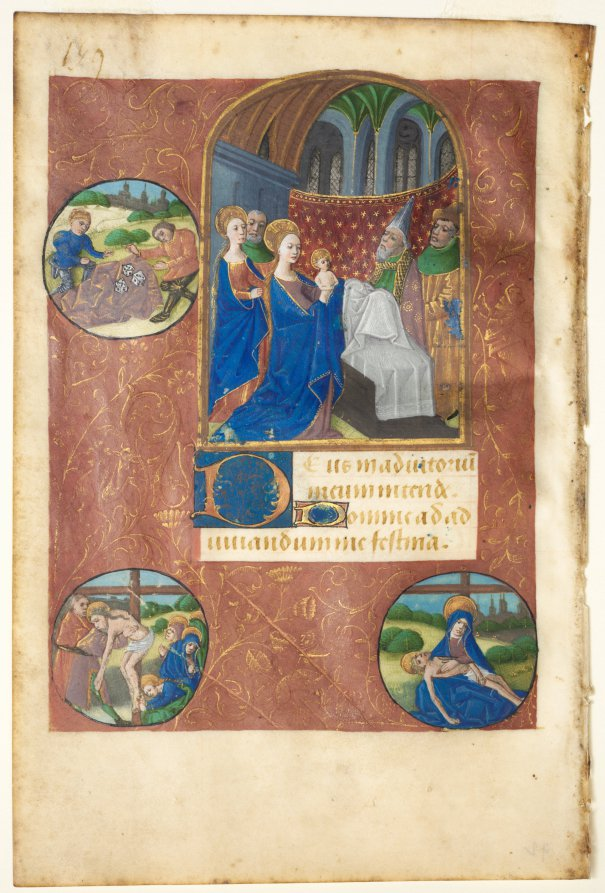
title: Leaf from a Book of Hours: Presentation in the Temple with Roundels of the Casting of Lots, the Deposition, and Pietà (None, Office of the Virgin)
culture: France, probably Poitiers, 15th century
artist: follower of Master of Adélaïde de Savoie (French, active c. 1450–70)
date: c. 1460–70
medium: ink, tempera and gold on vellum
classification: Manuscript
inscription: Deus in adiutorium meum intende. Domine, ad adiuvandum me festina.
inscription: Oratio: Omnipotens sempiterne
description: The style of this miniature, with its oval faces, abundant draperies, and use of border roundels, follows very closely the characteristics of the Master of Adélaïde de Savoie, who takes his name from a book in Chantilly (Musée Condé, MS. 1362). His activity points to Poitiers in western France as a possible place of production for this piece. The miniature features the unusual placement of roundels showing scenes taken from Christ's Passion against an episode from the life of the Virgin. The main miniature, the Presentation in the Temple, depicts the bringing of the infant Jesus to the Temple forty days after his birth to be consecrated according to Jewish law. During the ceremony, the temple's priest, Simeon, foretold that "Mary's heart would be pierced through her child." The roundels visually dovetail the central miniature.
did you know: The images and decorated initials in the book helped users navigate to sections they needed while also offering details to provoke meditation and prayer, leading to books of hours sometimes being referred to as “painted prayers.”